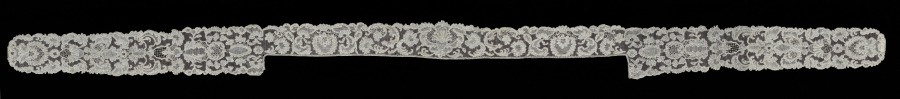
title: Lace Lappets and Edging for Cap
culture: France, Alençon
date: 1700–1715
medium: Needle lace (Point d'Alençon)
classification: Lace